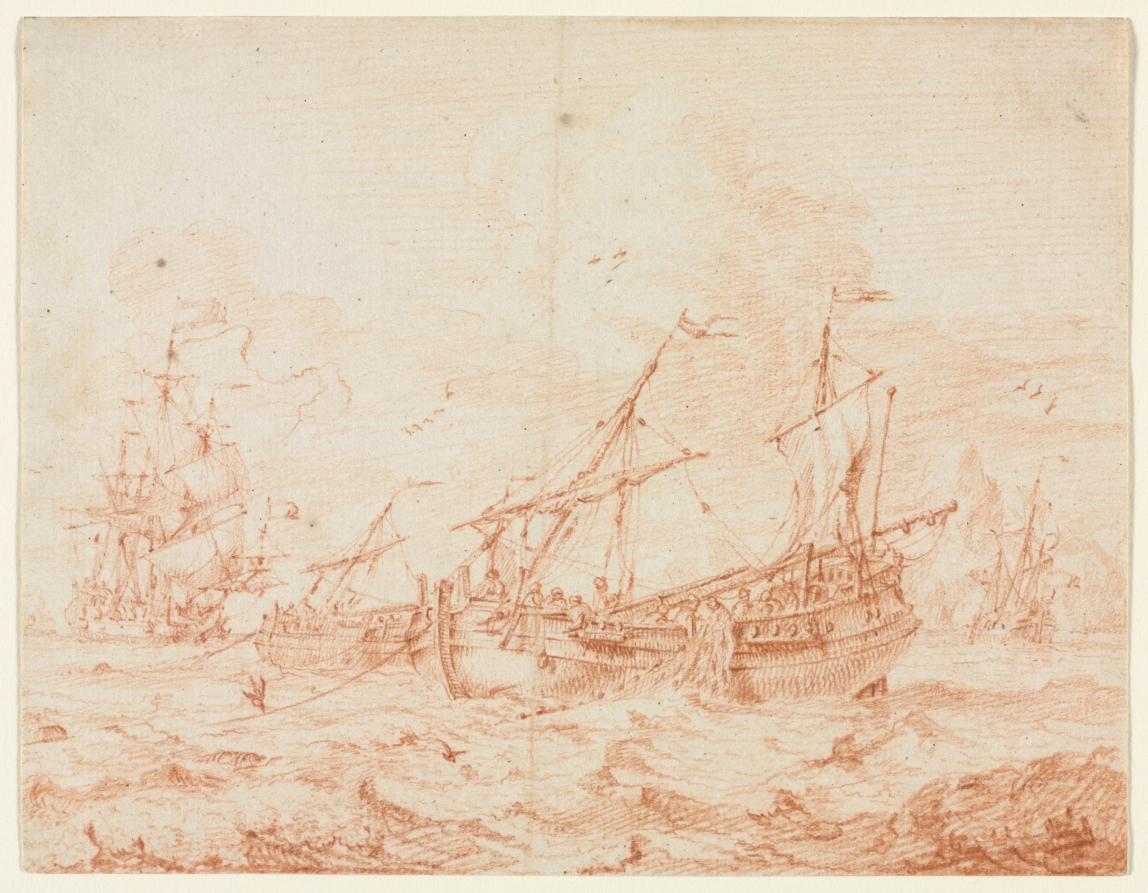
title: The Herring Bark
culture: Netherlands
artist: Sieuwert van der Meulen (Dutch, 1730)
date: 1700–1730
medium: red chalk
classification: Drawing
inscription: VERSO, lower left, in graphite: no: 7-